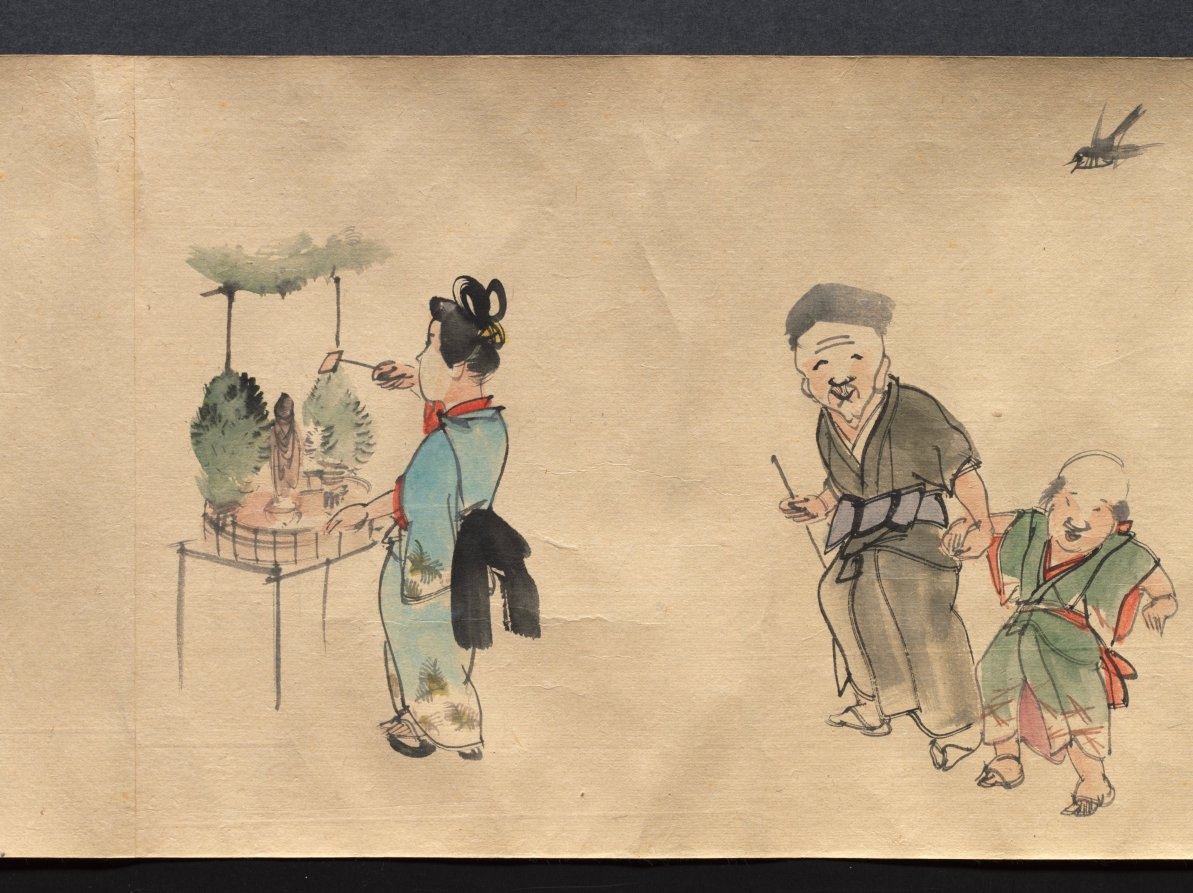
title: Festival Scenes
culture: Japan, Edo period (1615–1868)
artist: Suzuki Nanrei (Japanese, 1775–1844)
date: c. 1795–1844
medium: handscroll; ink and color on paper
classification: Painting